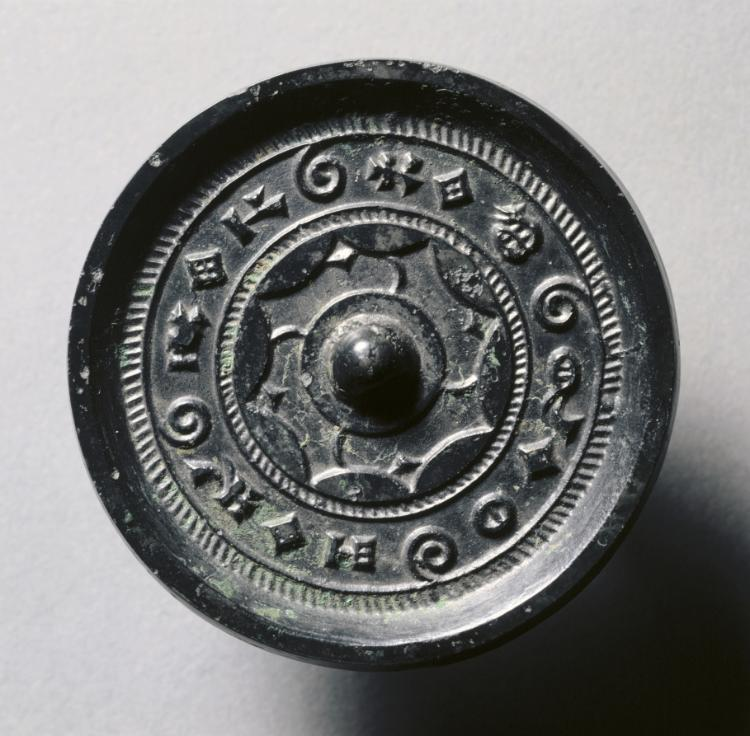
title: Mirror with Concentric Circles and Linked Arcs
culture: China, Western Han dynasty (206 BCE–8 CE)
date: late 300s BCE–50 CE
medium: bronze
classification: Metalwork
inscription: By the light of the sun, the world is made bright.